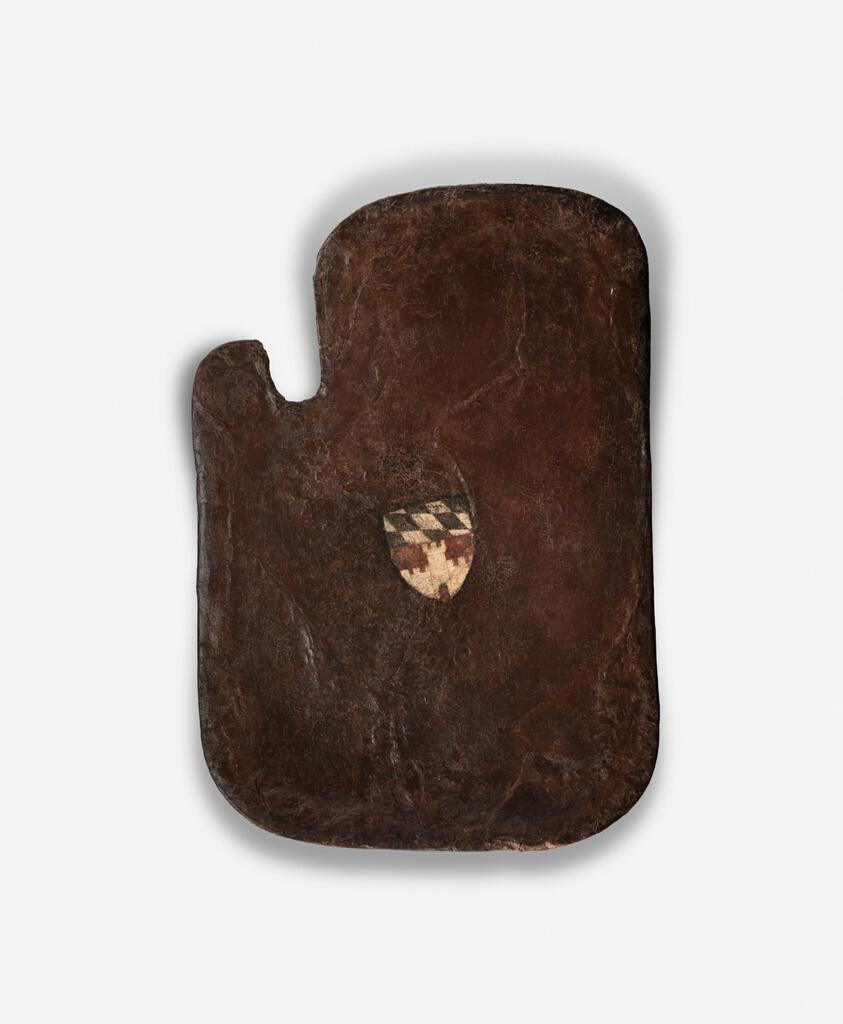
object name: Armor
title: Jousting Shield (Stecktarge) with the Coat of Arms of the City of Deggendorf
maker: South German; Bavaria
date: 1450/60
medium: Wood, iron, leather, canvas, gesso, and paint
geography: Saxony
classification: shield; armor; arms and armor